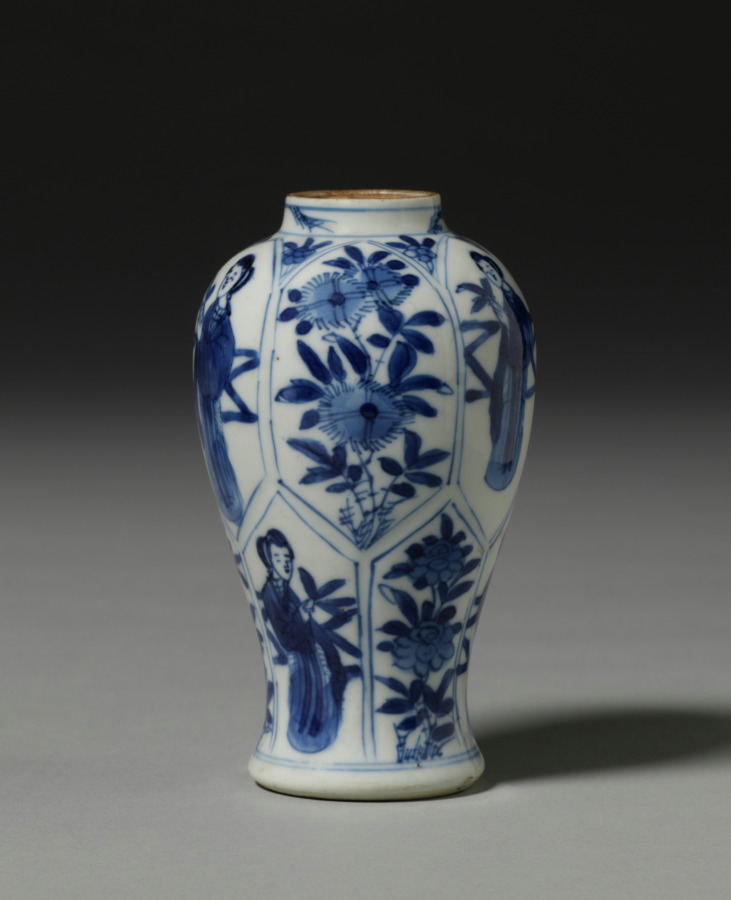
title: Jar with Cover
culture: China, Qing dynasty (1644-1911)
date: 19th Century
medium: porcelain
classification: Ceramic